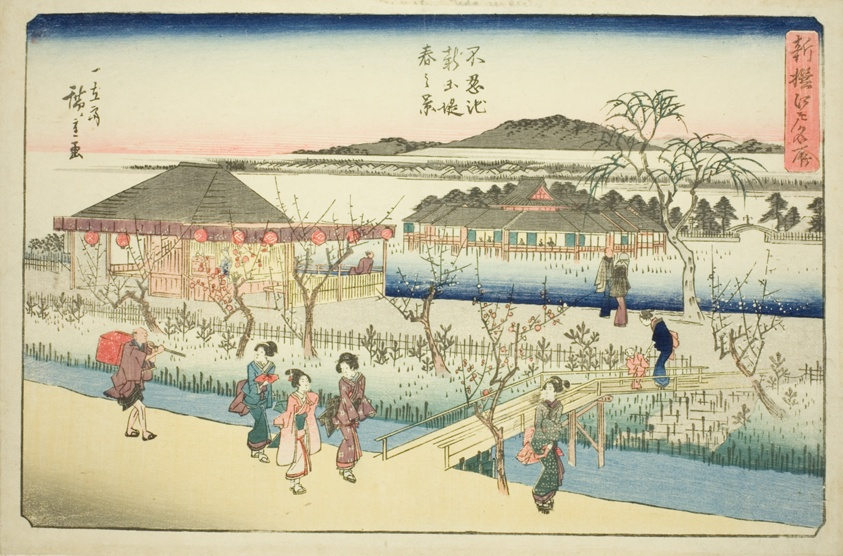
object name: Print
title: Spring View of the New Embankment at Shinobazu Pond (Shinobazu ike shin dote haru no kei), from the series "Newly Selected Famous Places in Edo (Shinsen Edo meisho)"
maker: Utagawa Hiroshige 歌川 広重; Japanese, 1797-1858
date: c. 1839/42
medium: Color woodblock print; oban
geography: Japan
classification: woodblock print; print; asian art